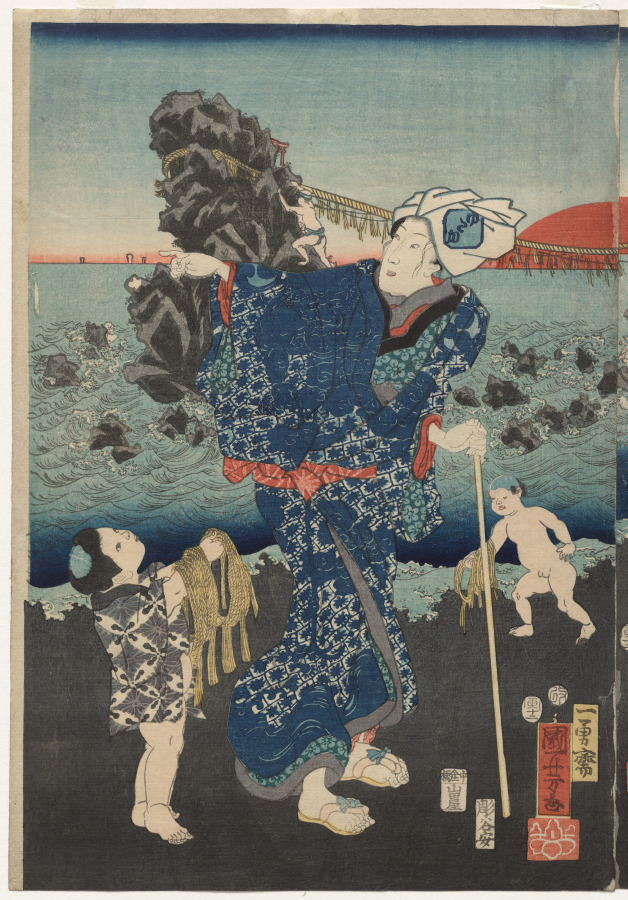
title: Splendid View at Futamigaura Bay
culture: Japan, Edo period (1615–1868)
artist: Utagawa Kuniyoshi (Japanese, 1797–1861)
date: 1854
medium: Left print from a triptych of color woodblock prints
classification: Print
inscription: Signature: Ichiyusai Kuniyoshi ga. Artist Seal: Paulownia. Publisher: Yamadaya Shohei (Nakabashi, emblem). Engraver: Hori Taniyasu. Censorship Seal: aratame.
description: This is one of three prints forming a continuous scene of figures visiting Futamigaura Bay near Ise Grand Shrine, one of Japan’s most sacred places. In the background, the sun rises between the “Wedded Rocks” joined by a twisted rope, called a shimenawa, used to designate a sanctified space. The rocks mark the entrance to Futami Okitama Shrine and are said to be embodiments of Izanagi and Izanami, the gods who, according to myth, created Japan. Futamigaura was a place where pilgrims purified themselves before visiting Ise and often lodged afterwards.